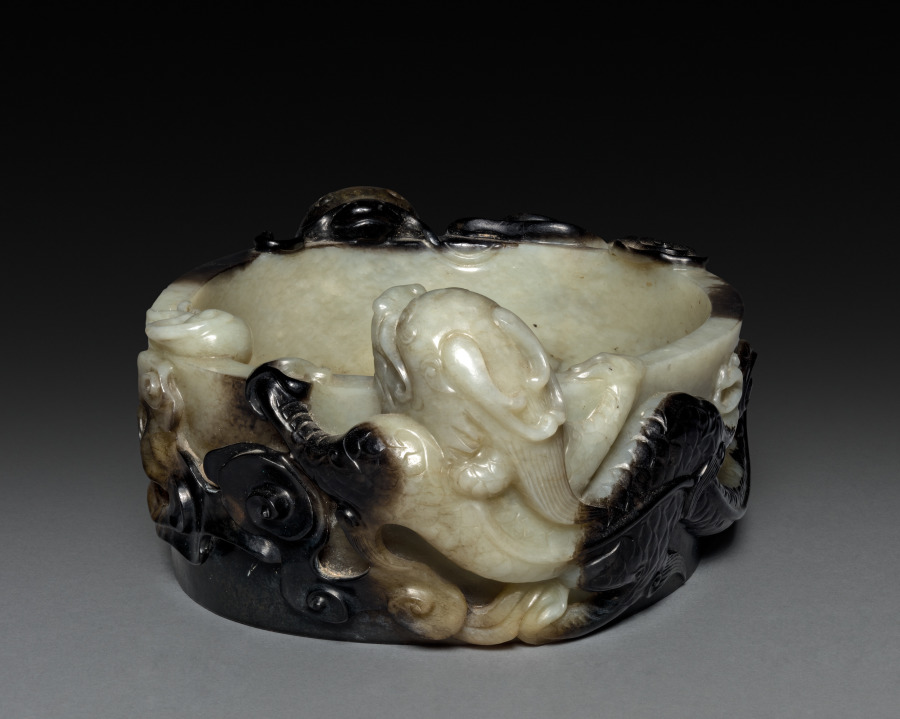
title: Dish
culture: China, Ming dynasty (1368–1644)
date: 1368– 1644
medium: jade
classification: Jade